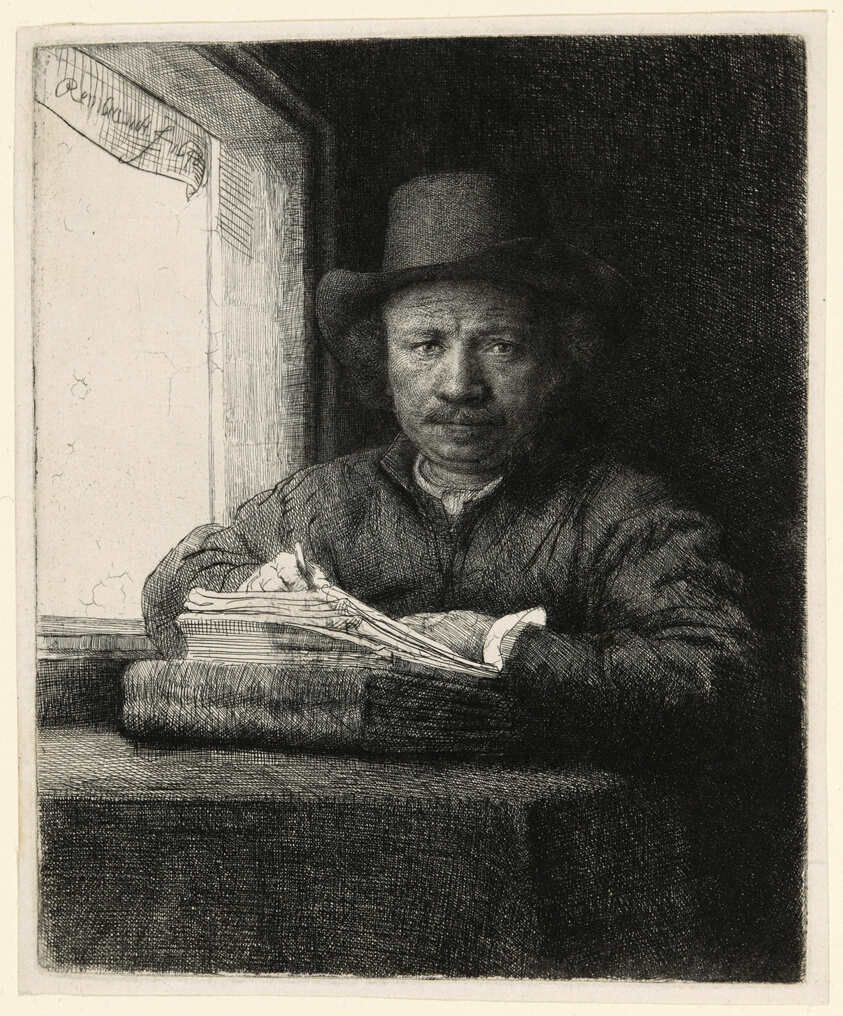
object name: Print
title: Self-Portrait Etching at a Window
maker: Rembrandt van Rijn (Dutch, 1606-1669)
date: 1648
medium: Etching, drypoint and burin in black on ivory laid paper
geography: Netherlands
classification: etching; print; prints and drawing; paper; drypoint; burin